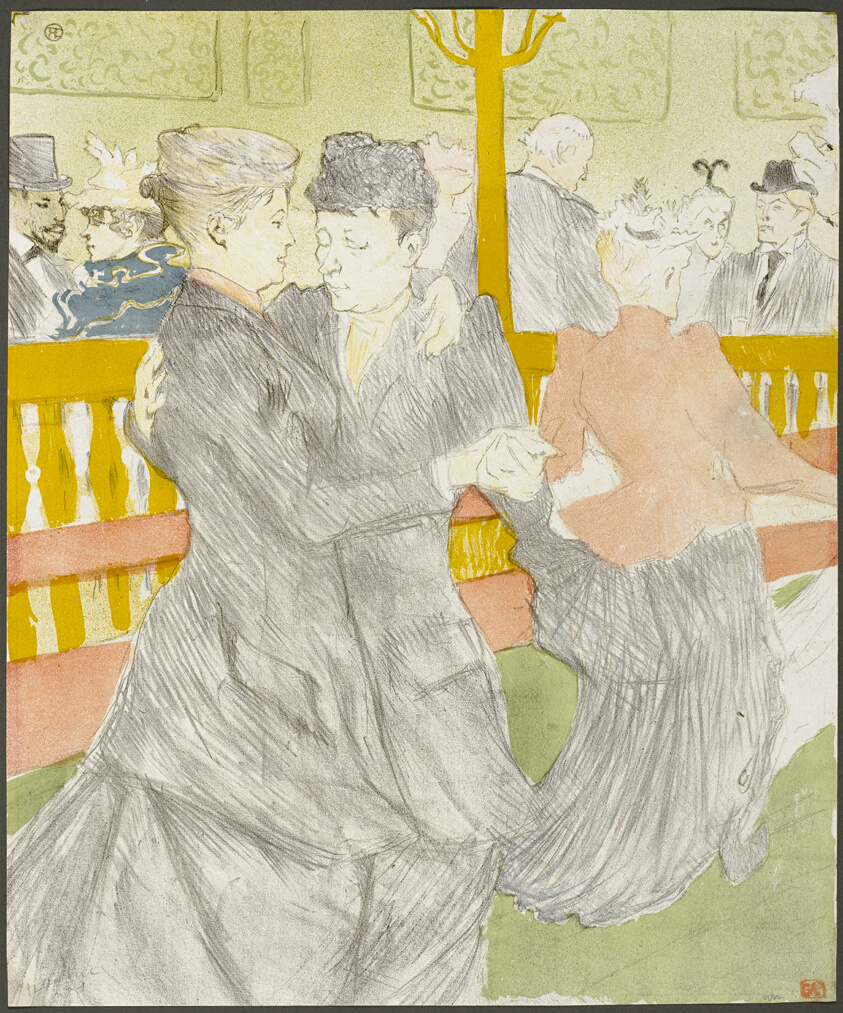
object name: Print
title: Dance at the Moulin Rouge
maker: Henri de Toulouse-Lautrec (French, 1864-1901)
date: 1897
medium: Color lithograph on grayish-ivory laid China paper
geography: France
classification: lithograph; print; prints and drawing